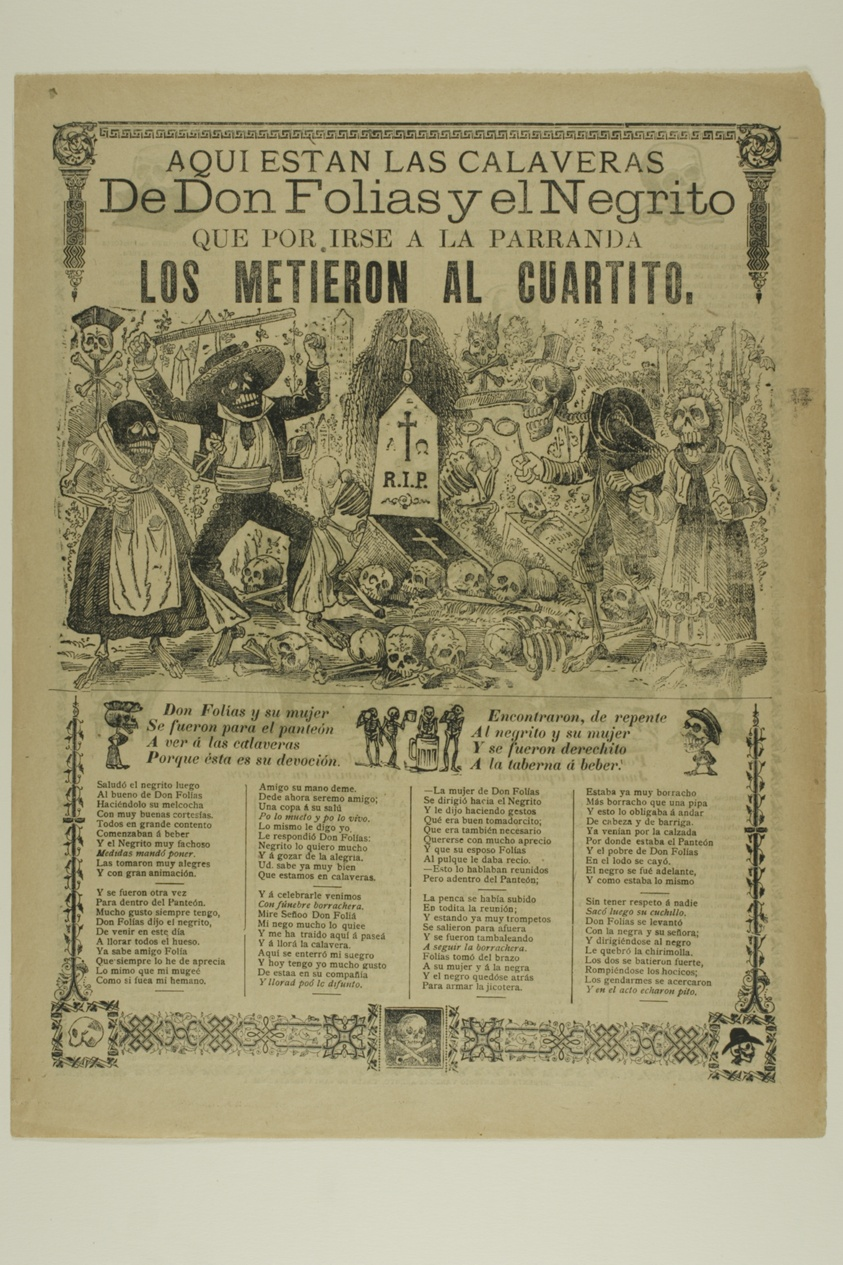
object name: Print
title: Aquí están las calaveras de Don Folias y el Negrito (Here Are the Calaveras of Don Folias and El Negrito)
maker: José Guadalupe Posada (Mexican, 1852-1913)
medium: Photo-relief etching with engraving on tan wove paper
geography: Mexico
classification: relief etching; print; prints and drawing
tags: text